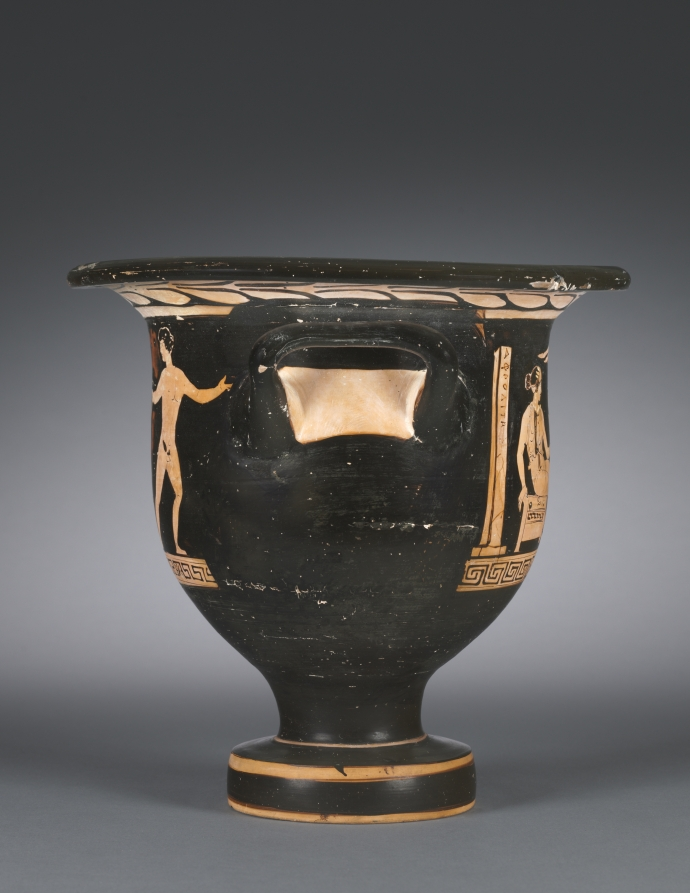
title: Red-Figure Bell Krater (Mixing Vessel): Aphrodite and Eros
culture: South Italian, Apulian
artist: attributed to Graz Painter (South Italian, Apulian, active c. 380–360 BCE)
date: c. 370–360 BCE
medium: ceramic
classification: Ceramic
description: This small mixing vessel shows a finely dressed woman seated on a chest and holding up a mirror to admire herself. Before her stands Eros, the winged god of love, holding a ribbon or sash. Behind the woman stands a pillar with the inscription ΑΦΡΟΔΙΤΗ, or APHRODITE, the goddess of love. Such labels are rare on vases, and scholars debate whether this names the woman shown as Aphrodite herself, with her son Eros, or a bride envisioning herself as Aphrodite, just before her wedding.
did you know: The dancing nude youths on the reverse are unusual; typically they would be standing and draped.